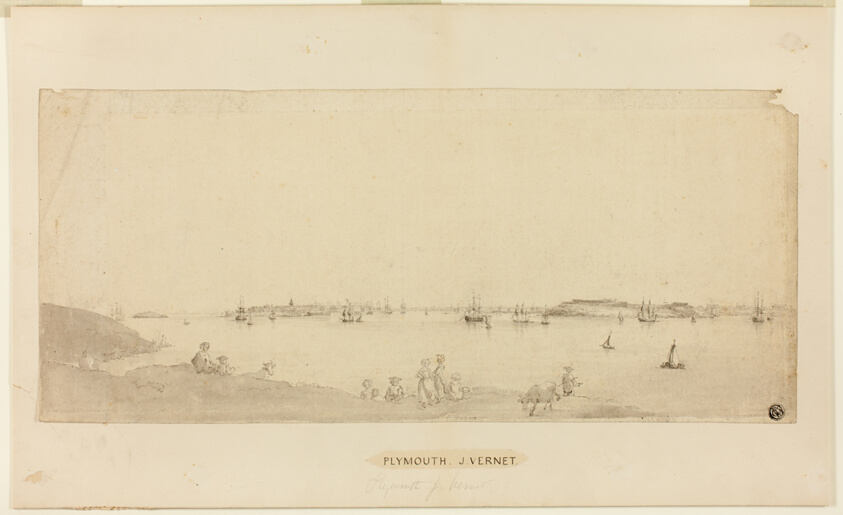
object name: Drawing and Watercolor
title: Plymouth Harbor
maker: Claude-Joseph Vernet; French, 1714-1789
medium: Pen and grayish-black ink, and brush and gray wash, on cream laid paper, laid down on buff board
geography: France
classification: pen and ink drawings; drawings (visual works); prints and drawing